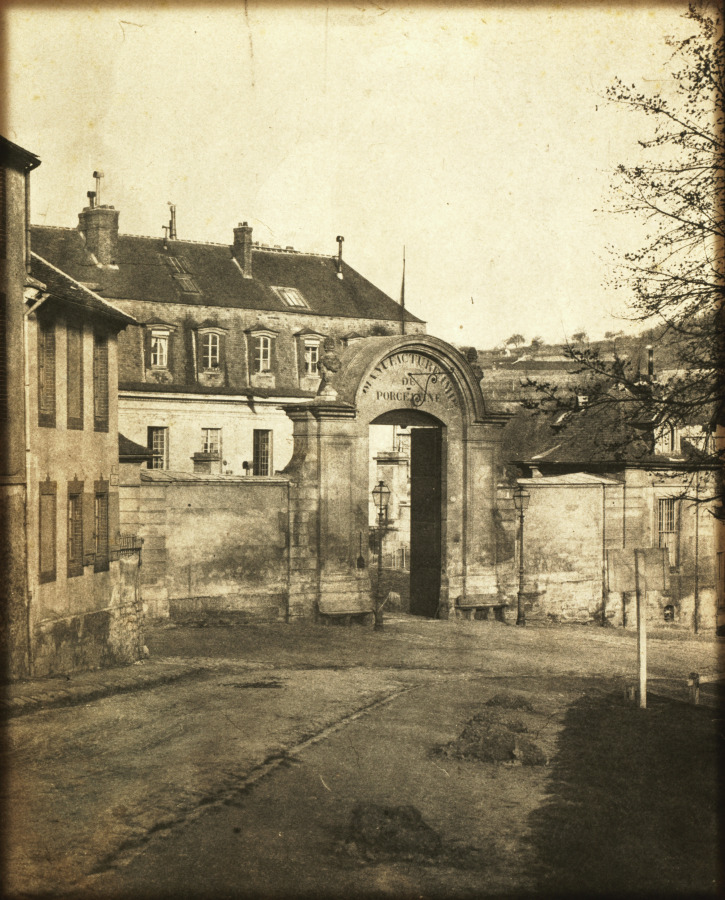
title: Doorway to Sèvres Factory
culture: France, Sèvres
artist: Louis-Rémy Robert (French, 1811–1882)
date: c. 1852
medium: salted paper print, waxed, from waxed paper negative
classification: Photograph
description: Originally trained by his father as a painter on glass and porcelain, Louis-Rémy Robert was taught photography by Henri-Victor Regnault, a close associate and director of the Sèvres porcelain factory. Particularly known for landscape and architectural views, Robert depicted here the gateway to the Sèvres factory, where he was head of the painting and gilding studio from 1848–1871. He then became director of the factory for eight years. In this scene, the artist not only provided a sense of place, but also transformed a complex composition into a unified, compelling assemblage of shapes, textures, and tonalities. The print is shown with its original waxed paper negative—an unusual occurrence since early negatives have rarely survived the passage of time.